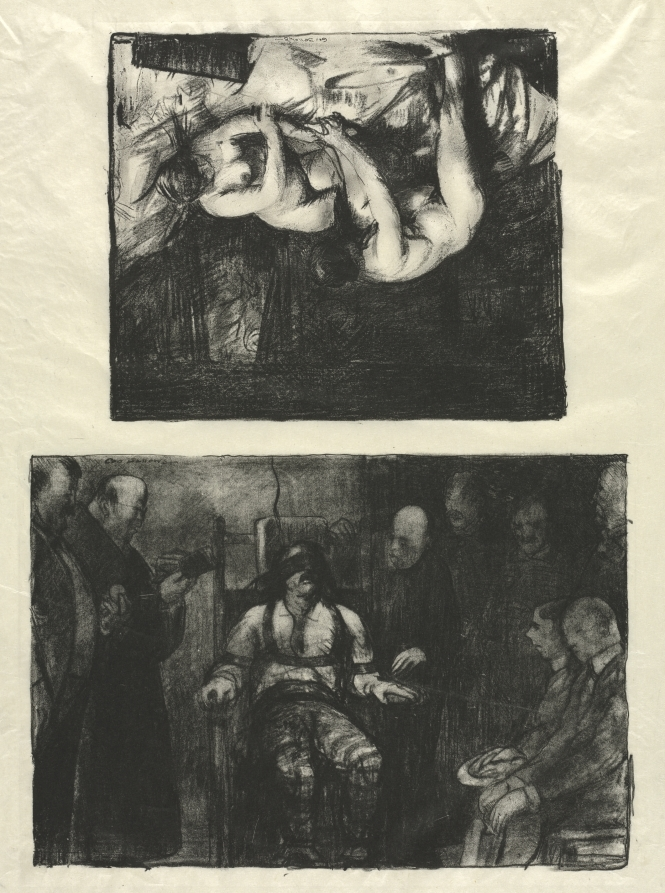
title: Electrocution, first state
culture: America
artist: George Bellows (American, 1882–1925)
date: 1917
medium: lithograph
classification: Print